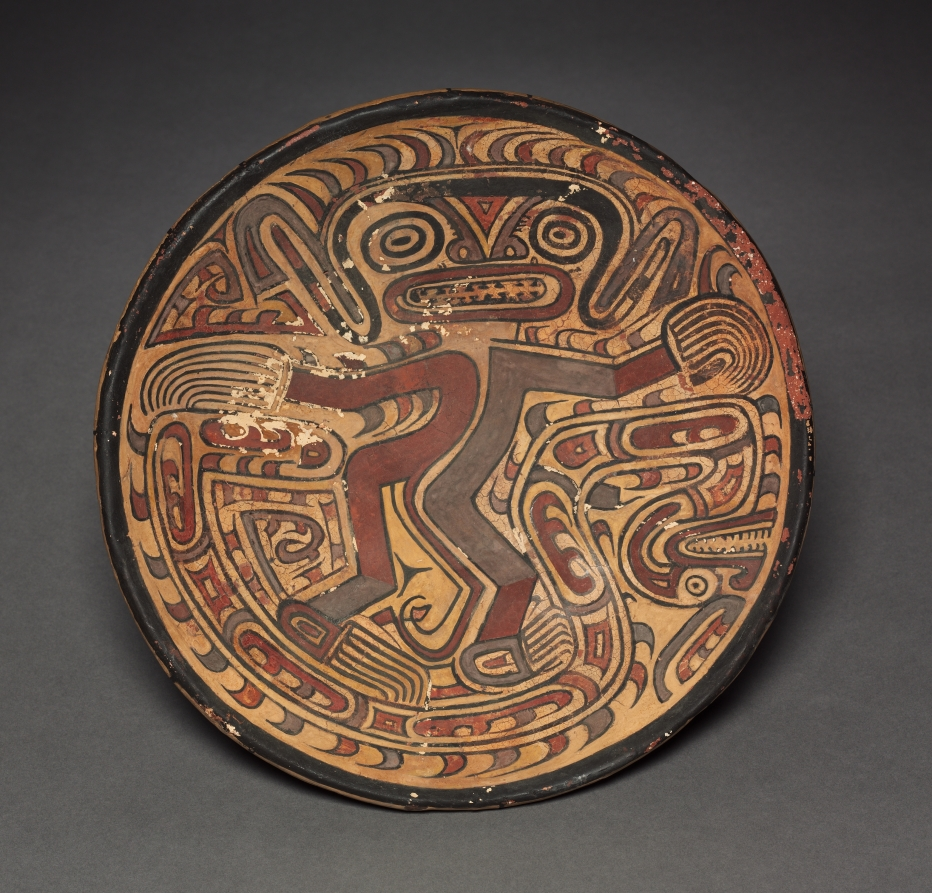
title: Pedestal Plate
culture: Panama, Coclé, 14th-15th century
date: 1300s-1400s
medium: earthenware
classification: Ceramic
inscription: Inscribed on base: "50-18-20/1 (?) 3 (?) 86"